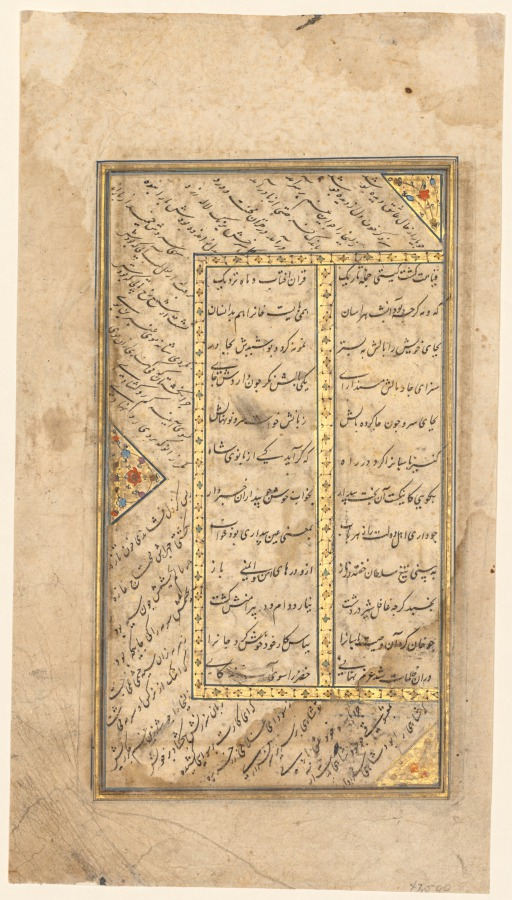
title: Persian verses from a Haft Awrang (Seven Thrones) of Jami (d. 1492) (recto)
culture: Iran, probably Shiraz, Safavid period (1501-1722)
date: mid-1500s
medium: opaque watercolor, ink, and gold on paper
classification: Manuscript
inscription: Script: Nasta'liq